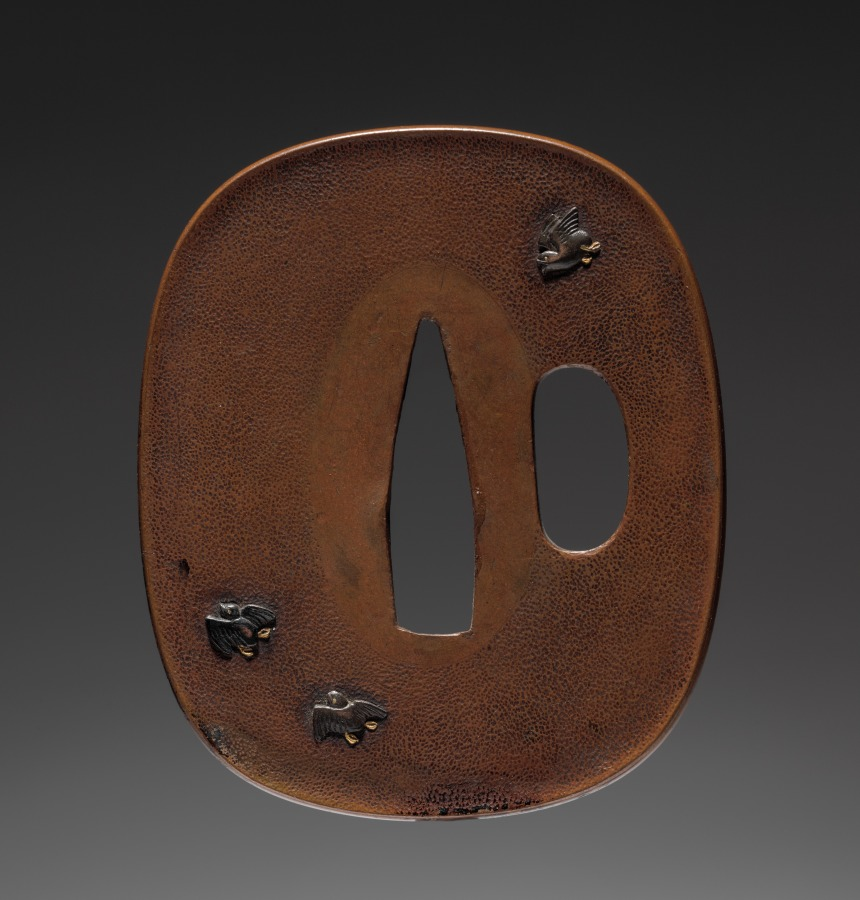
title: Sword Guard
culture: Japan, Edo period (1615–1868)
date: late 1700s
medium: bronze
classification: Arms and Armor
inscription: Signature: Noriyuke